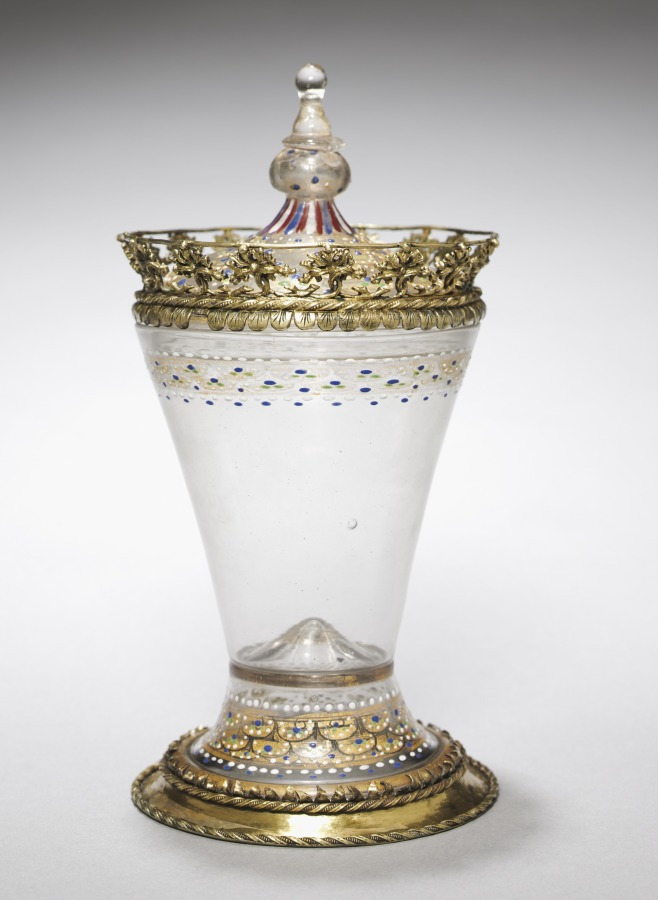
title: Covered Beaker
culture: Italy, Venice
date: c. 1490–1500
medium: glass, enameled and gilded, gilt-silver mounts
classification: Glass